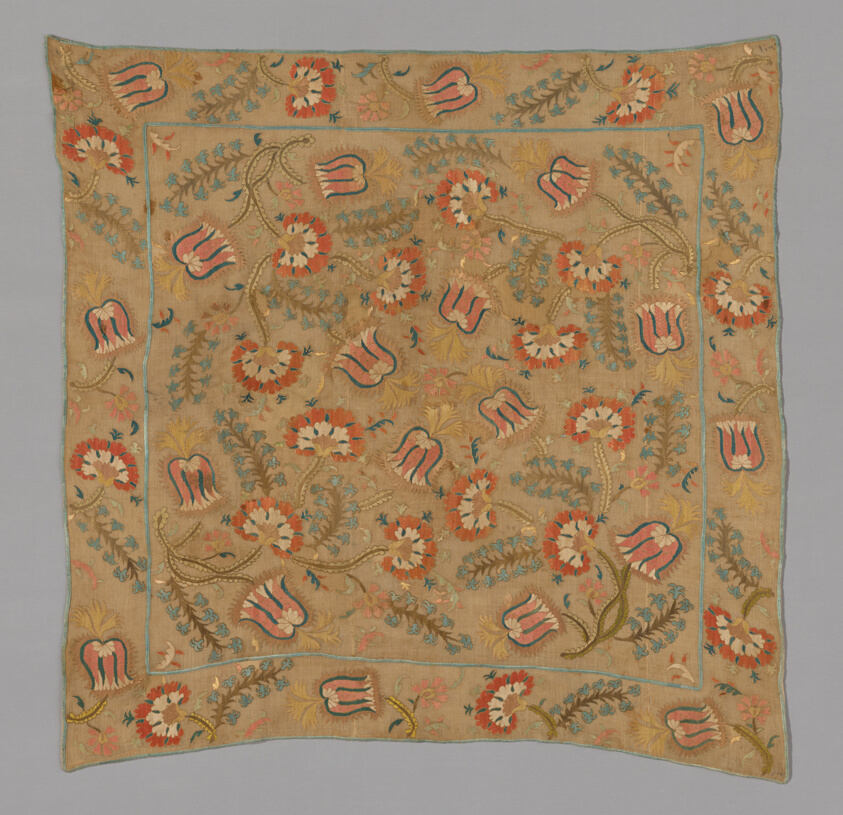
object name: Textile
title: Cover (possibly Turban Cover)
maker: Turkey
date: 18th century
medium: Linen, plain weave; embroidered with silk in fishbone, double running, and twined double running stitches; lined with cotton, plain weave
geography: Turkey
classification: textile; needlework (visual works)